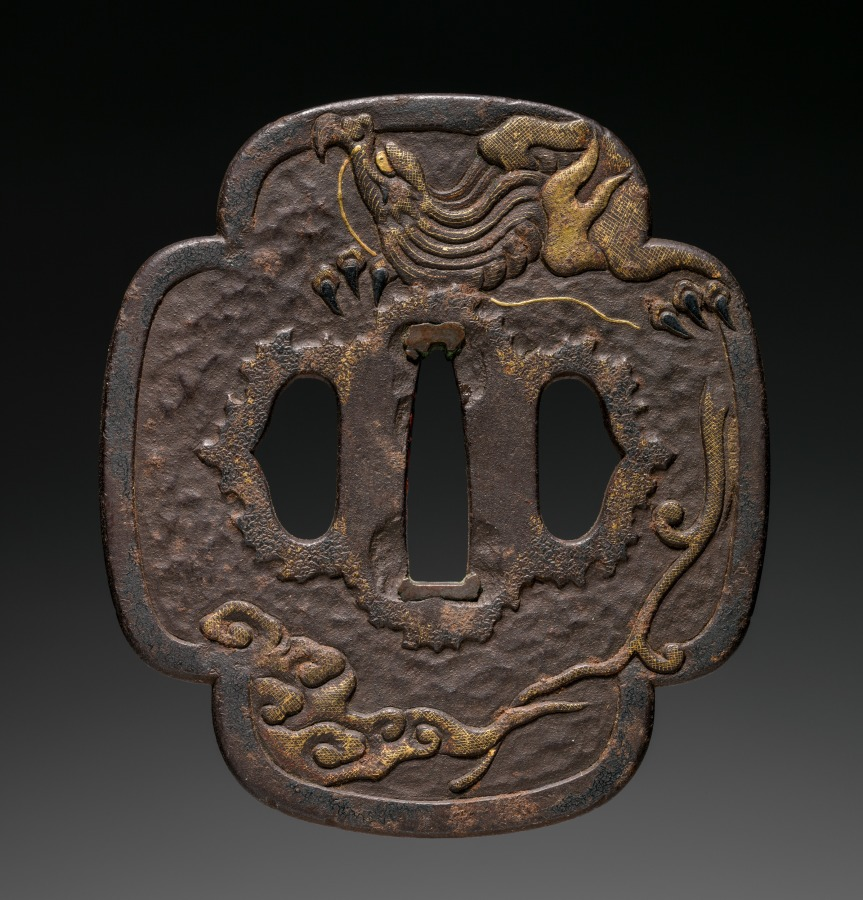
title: Sword Guard (Tsuba) with Dragon in Storm and Sea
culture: Japan, possibly Edo period (1615-1868)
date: c. 1615–1868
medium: iron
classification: Arms and Armor